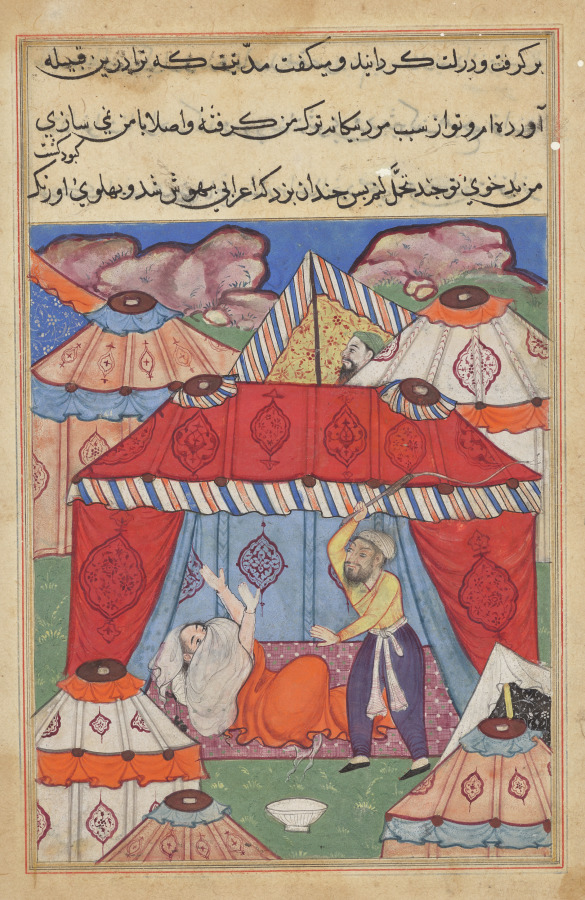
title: The disguised Arab, substituting for Habbaza, is whipped by her husband for refusing a bowl of milk, from a Tuti-nama (Tales of a Parrot): Twenty-fourth Night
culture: Mughal India, court of Akbar (reigned 1556–1605)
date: c. 1560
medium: gum tempera, ink, and gold on paper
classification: Painting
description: While Habbaza is away carrying on an affair with her lover Bashir, Bashir’s friend dresses in Habbaza’s clothes and waits in her tent. Each night, Habbaza’s husband offers her milk and when she refuses, leaves her in peace. This time, however, he becomes enraged at her silence and lashes out.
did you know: The white bowl of milk sits neglected in the center of the scene.